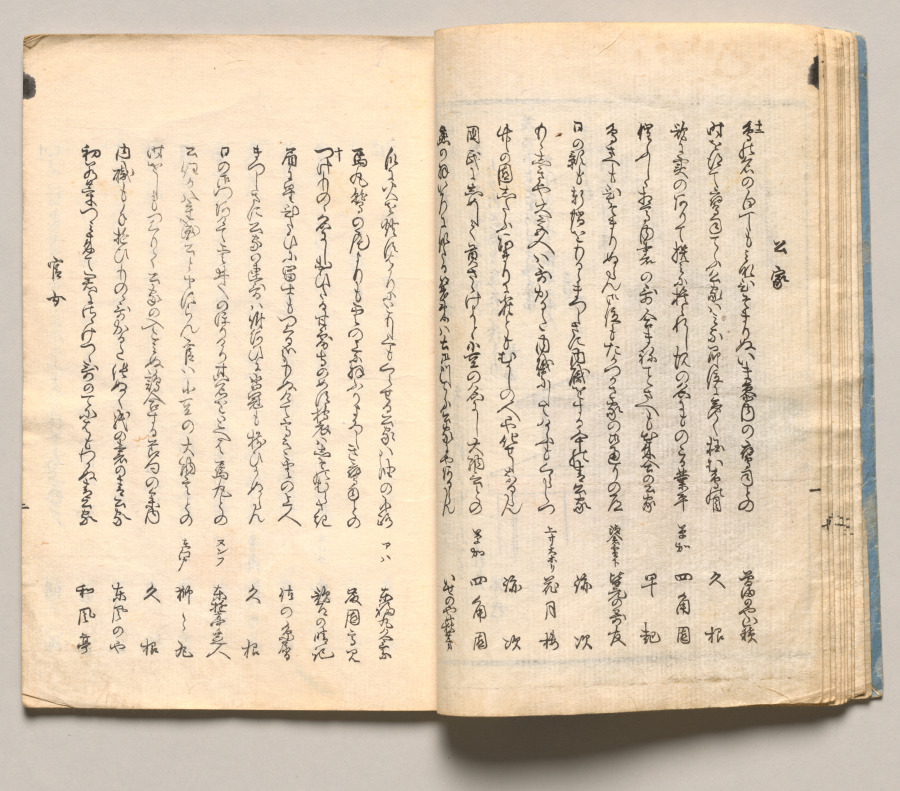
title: Spread Ten from Volume One of People of Japan in Light Verse (Kyōka)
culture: Japan, Edo period (1615–1868)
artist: Utagawa Hiroshige (Japanese, 1797–1858)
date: 1857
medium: Woodblock-printed book; ink and color on paper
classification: Bound Volume